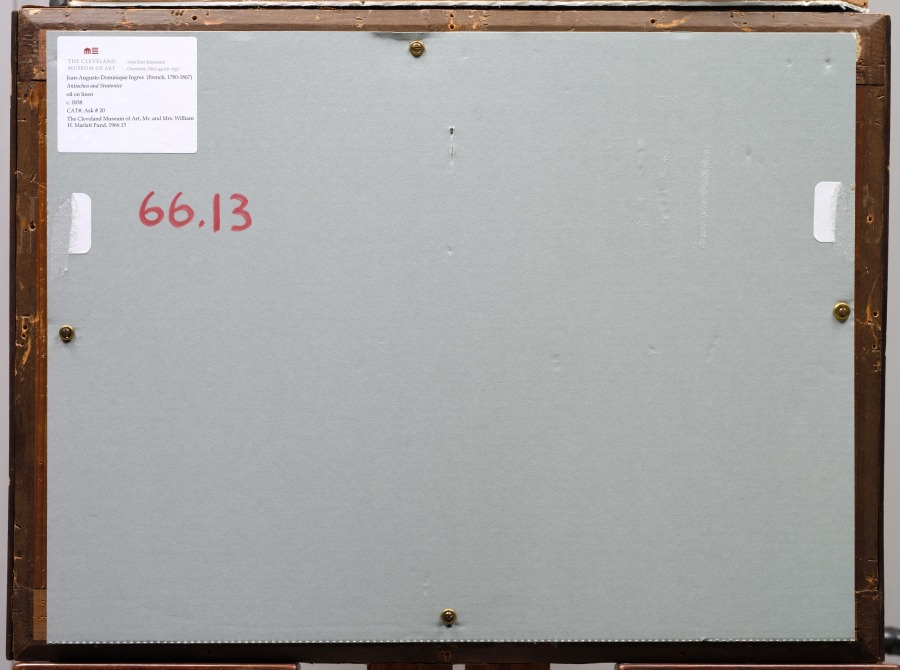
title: Antiochus and Stratonice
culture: France, 19th century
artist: Jean-Auguste-Dominique Ingres (French, 1780–1867)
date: c. 1838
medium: oil on linen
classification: Painting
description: Struck by a mysterious illness, Antiochus lies in bed near death. His grieving father, who has recently taken Stratonice as his wife, summons a doctor. Noticing that the sight of the young woman quickens Antiochus’s pulse and that passion causes his sickness, the doctor describes the youth’s predicament to his father, who selflessly offers Stratonice to his son. The subject, both a love story and an example of parental devotion, enjoyed considerable popularity well into the 1800s.